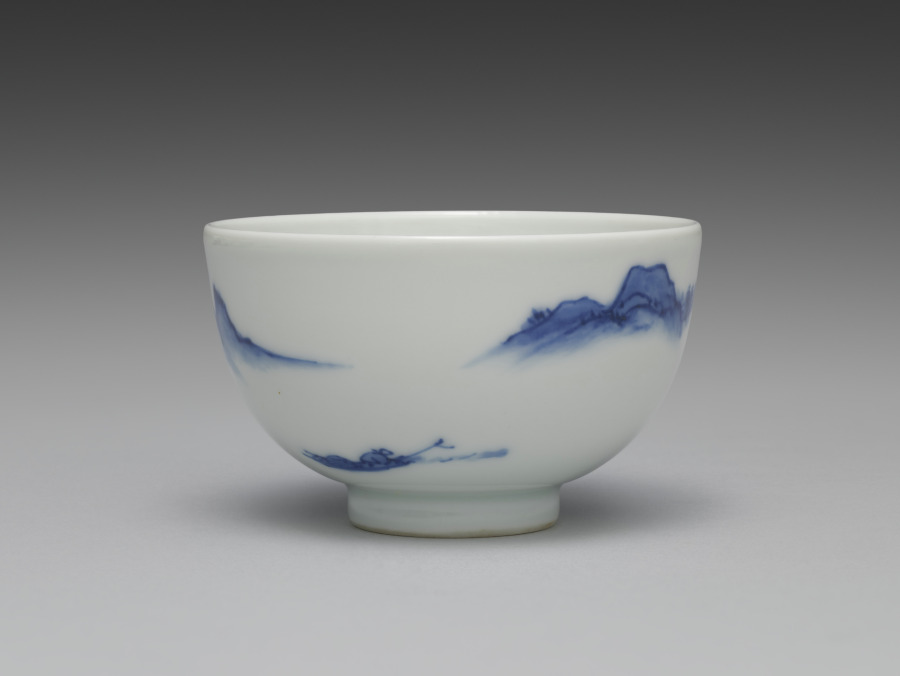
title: Teacup from Tea Set with Chinese Landscape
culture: Japan, Meiji period (1868–1912)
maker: Seifū Yohei III (Japanese, 1851–1914)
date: 1893–1914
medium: Porcelain with underglaze blue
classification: Ceramic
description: This tea set has a side-handled pot called a kyūsu, used for steeping, straining, and serving tea. Unlike some others, this set also has a yuzamashi, a container used to cool boiled water to just the right temperature for the best flavor when steeping. Seifū Yohei III’s painting teacher, Tanomura Chokunyū (1814–1907), made a visual record of famous sencha events that shows how these kinds of porcelains fit with objects such as a stove and kettle to form a complete set of utensils for tea preparation, and with ensembles of decorative objects meant to inspire creativity. The theme of this sencha tea set is the Chinese scholar-recluse in an idyllic landscape. Each of the five teacups has a landscape with an architectural structure and some human activity.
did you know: This cup shows a man in a traveling robe leaning upon his staff as he crosses a bridge to reach a two-story building with a pitched roof, possibly a temple, set between trees. Past this structure, another man sits fishing in a boat.